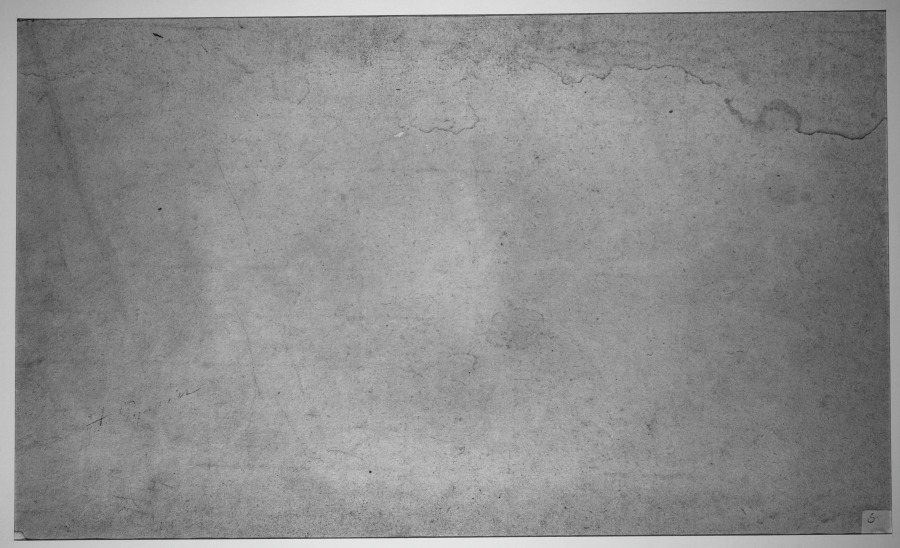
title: Wooded Landscape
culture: Netherlands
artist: Anthonie Waterloo (Dutch, 1609/10–1690)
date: after 1648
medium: Charcoal applied wet, brush and black and brown and white washes; black ink framing line on antique brown laid paper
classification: Drawing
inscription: On verso, pen or graphite inscription (erased?) A. Pynnier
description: Known exclusively for his drawings and prints, the Dutch artist Anthonie Waterloo specialized in tree studies and dense forest scenes such as this drawing. Here he created a vista through groupings of tall trees, producing the effect of shimmering light and movement with his unique technique of using wet charcoal over dry chalk. He added a subtle white wash throughout the center of the composition to create the hint of the sun’s glow beyond the trees. Such a work would have been sold as a finished work of art.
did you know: Studies of dense forests and individual trees were a specialty of Dutch artists in the 1600s.